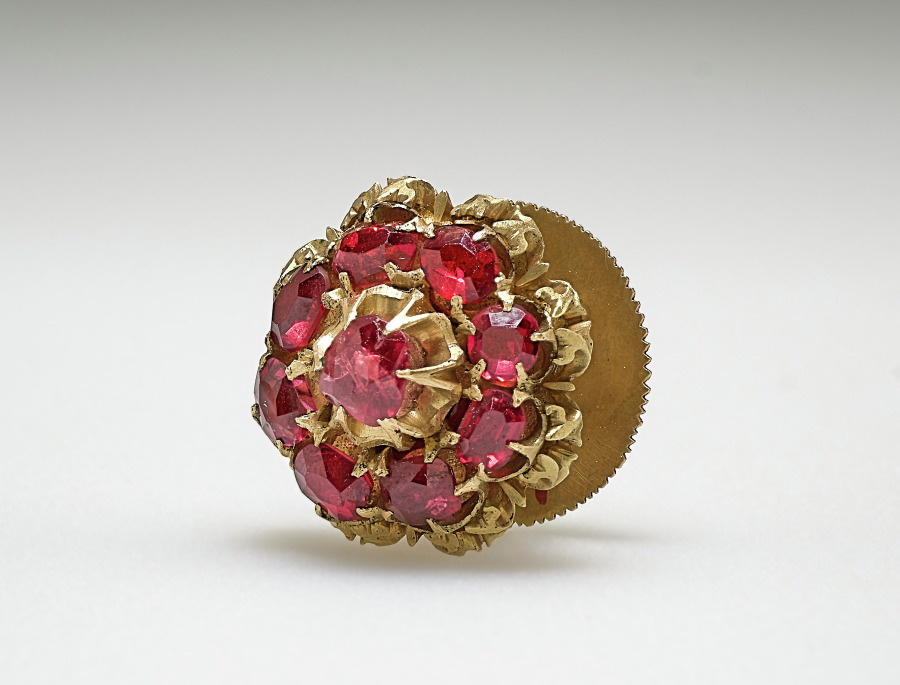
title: Earring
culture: Burma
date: 1800s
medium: gold and rubies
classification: Jewelry